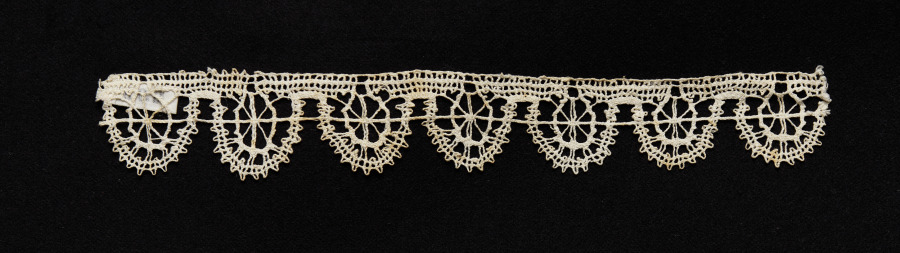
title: Lace Edging of Round Points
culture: Italy, Genoa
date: 1550–99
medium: Bobbin lace (needle lace, reticella design)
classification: Lace